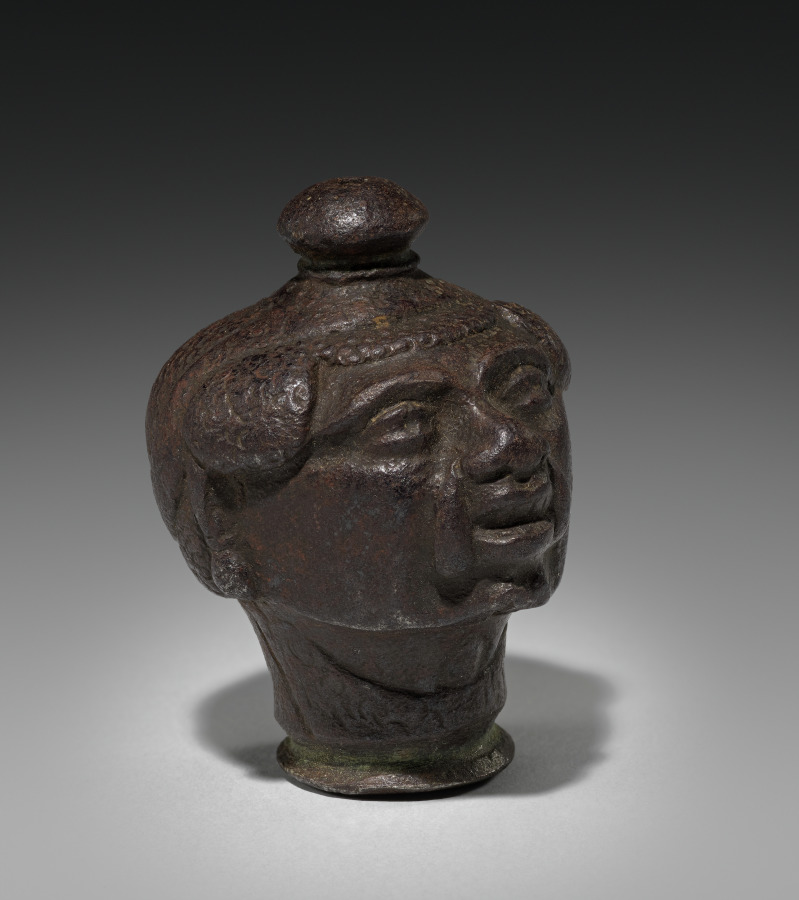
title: Pommel of Sword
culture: Italy, 17th century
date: 1600s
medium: steel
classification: Arms and Armor